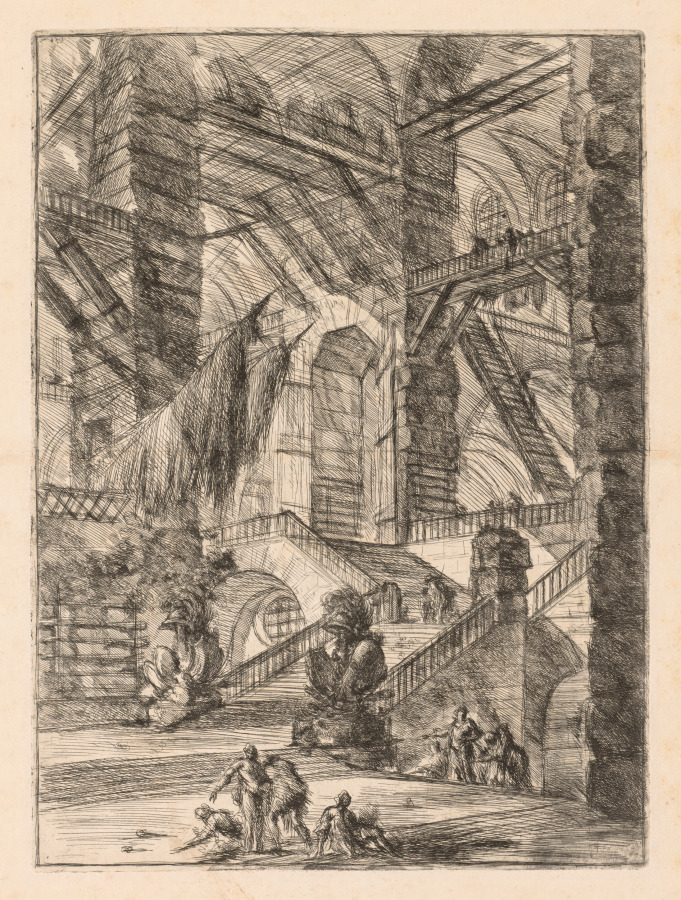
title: The Prisons: A Vast Interior with Trophies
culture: Italy, 18th century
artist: Giovanni Battista Piranesi (Italian, 1720–1778)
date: 1745–1750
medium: etching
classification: Print